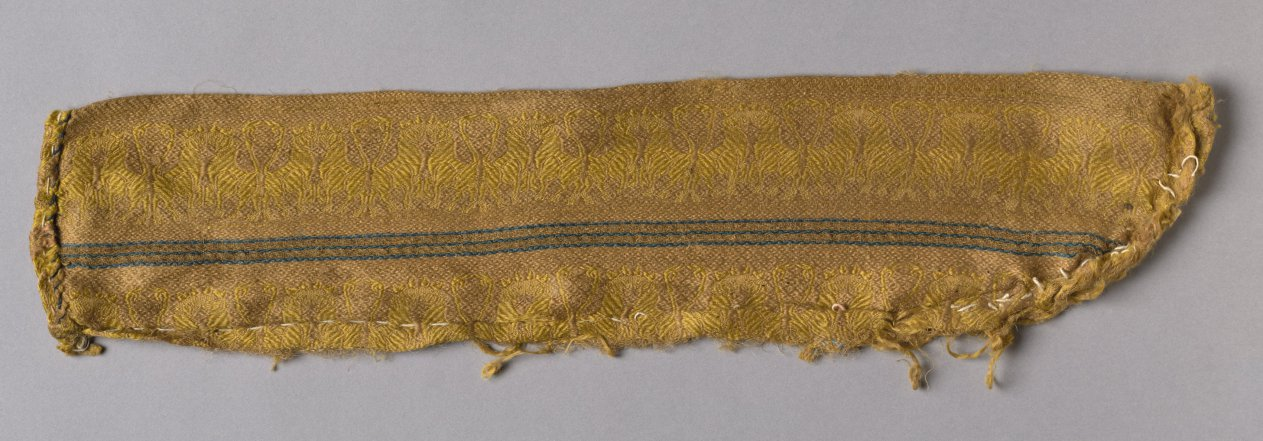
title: Reliquary bag with lions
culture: Spain, probably Almeria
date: late 1100s-1300s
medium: cloth d’areste, weft-faced lozenge twill variant: silk and gold thread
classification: Textile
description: This bag was originally inside of the portable altar commissioned by Countess Gertrude of Brunswick, one of the Guelph Treasure’s earliest and most sumptuous objects.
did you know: This silk bag originally held bits of mummified flesh or tissue which was labeled as being from Saint Bartholomew.